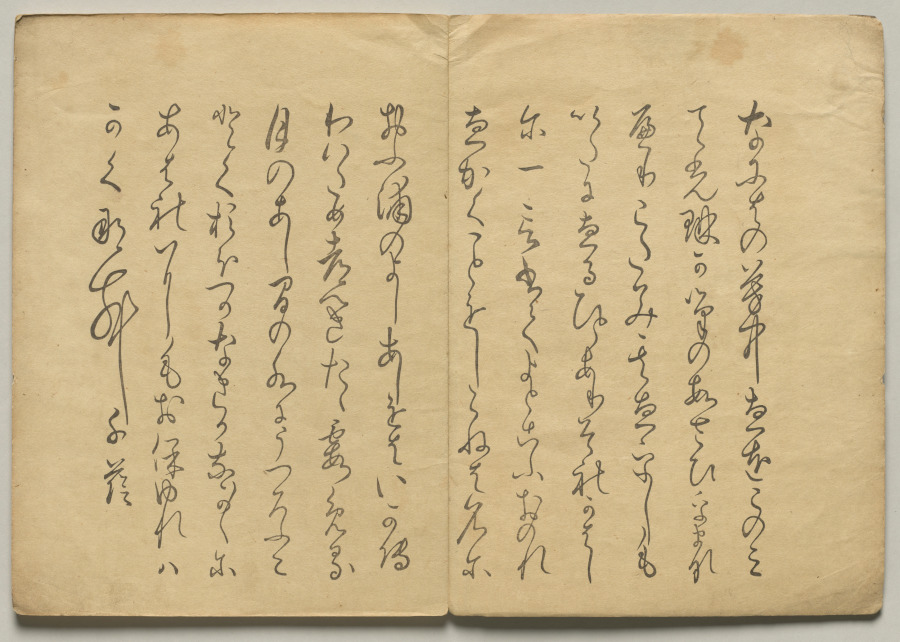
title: Scene from The Kōrin Picture Book (Volume 2)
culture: Japan, Edo period (1615–1868)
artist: Nakamura Hōchū (Japanese, d. 1819)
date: 1800s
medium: color woodblock printed book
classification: Bound Volume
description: Ogata Korin (1658-1716) was one of the most admired artists of Rimpa, or "decorative school painting." These books by the charming later-generation Rimpa artist Hochu record Korin's inventive designs.